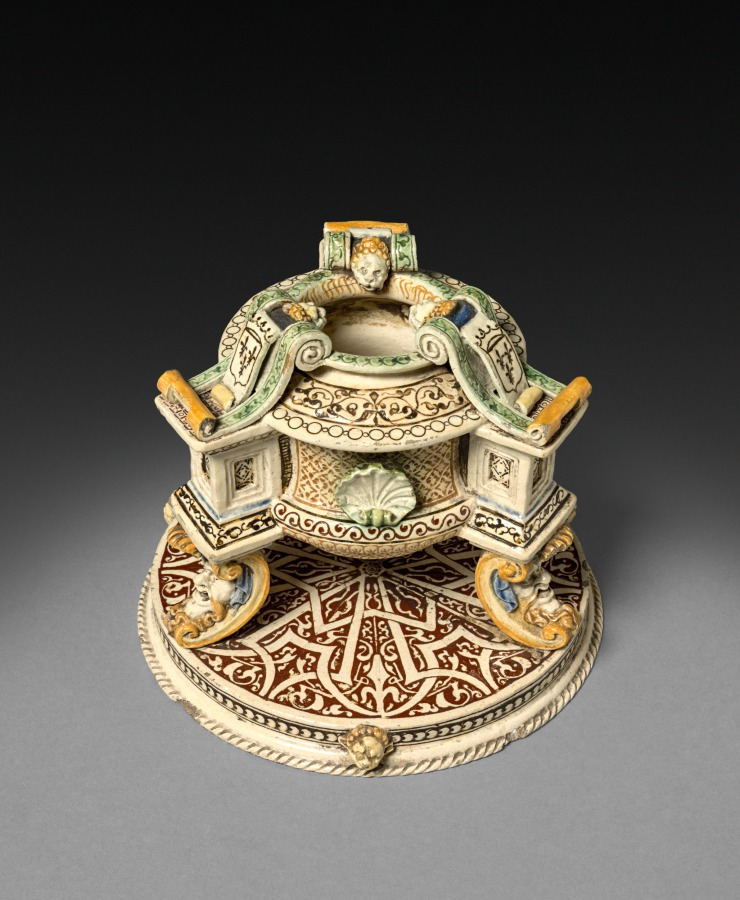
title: Salt Cellar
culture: France, 19th century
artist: after Saint-Porchaire (French)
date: 1800s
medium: white earthenware with inlaid decoration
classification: Ceramic